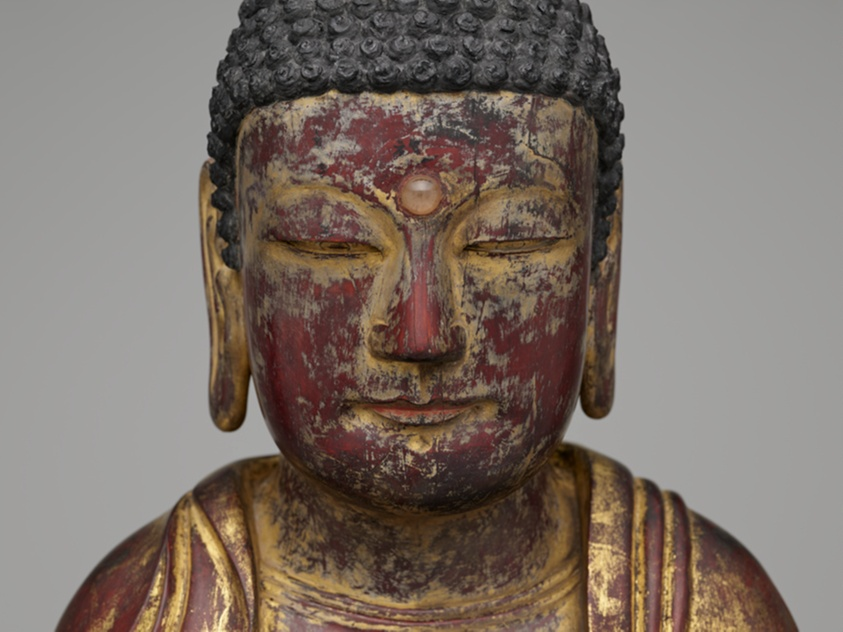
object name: Sculpture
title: Buddha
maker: Korea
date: Joseon dynasty (1392-1897), 18th century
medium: Lacquered wood with gilding, pigment, and glass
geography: Korea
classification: wood; sculpture; asian art